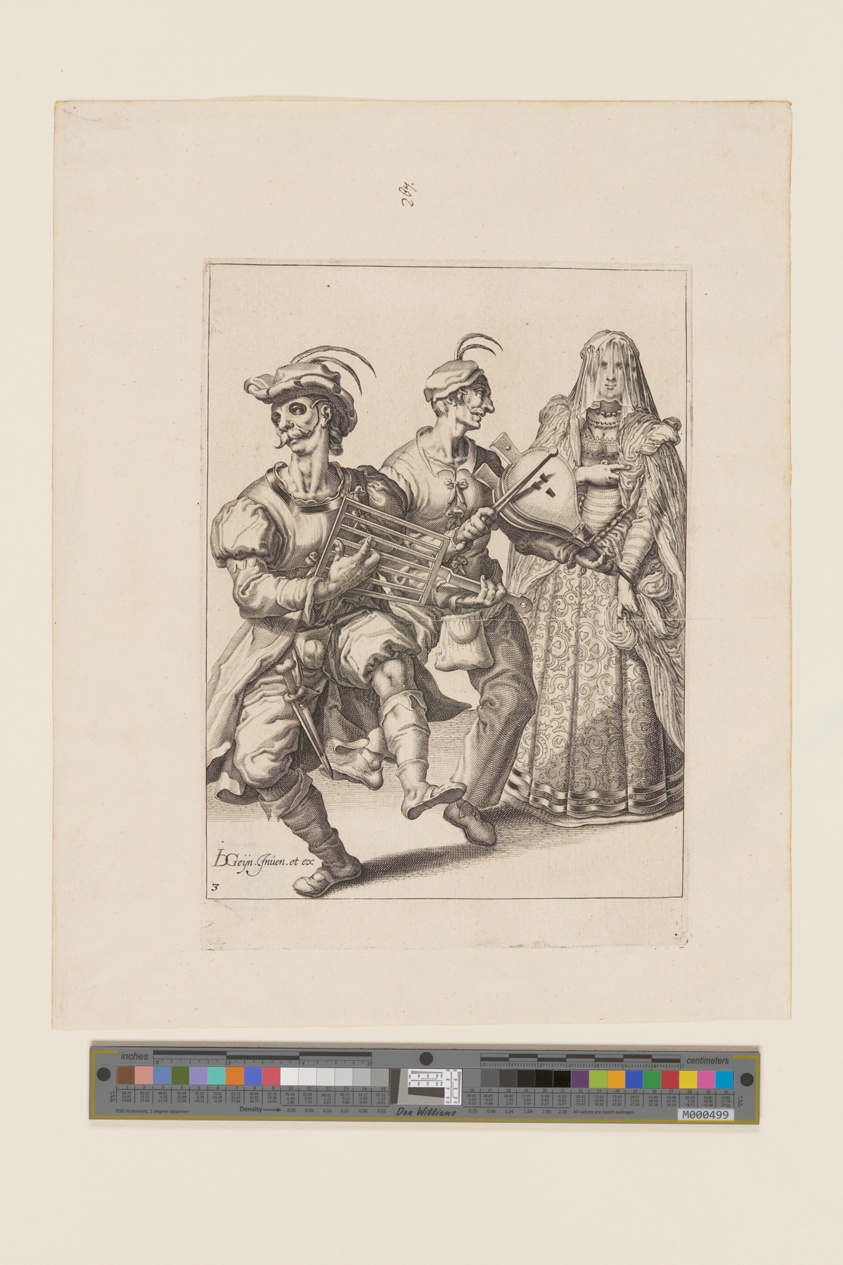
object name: Print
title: A Veiled Woman with Two Musicians Playing a Gridiron and a Bellows, from The Masquerades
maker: Jacques de Gheyn II; Dutch, 1565–1629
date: 1595-96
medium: Engraving on ivory laid paper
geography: Netherlands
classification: engraving; paper; print; prints and drawing